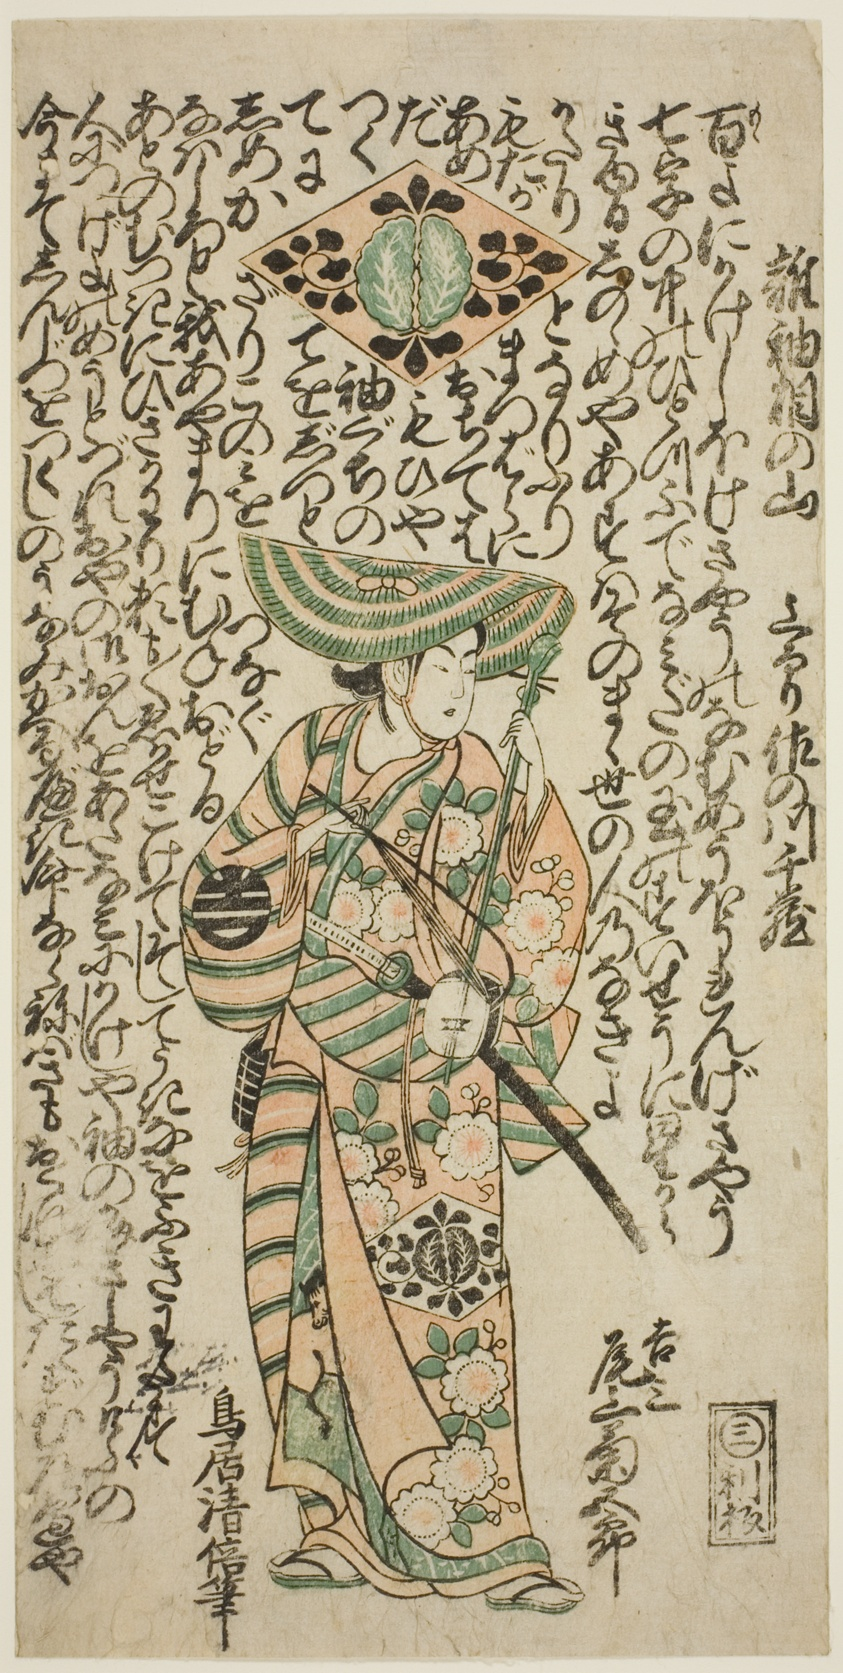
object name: Print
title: The Actor Onoe Kikugoro I as the pageboy Kichisaburo in the play "Nanakusa Wakayagi Soga," performed at the Ichimura Theater in the first month, 1744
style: Japanese (culture or style)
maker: Torii Kiyomasu II (Japanese, 1706 (?)–1763 (?))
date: 1744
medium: Color woodblock print; hosoban, benizuri-e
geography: Japan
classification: woodblock print; print; asian art